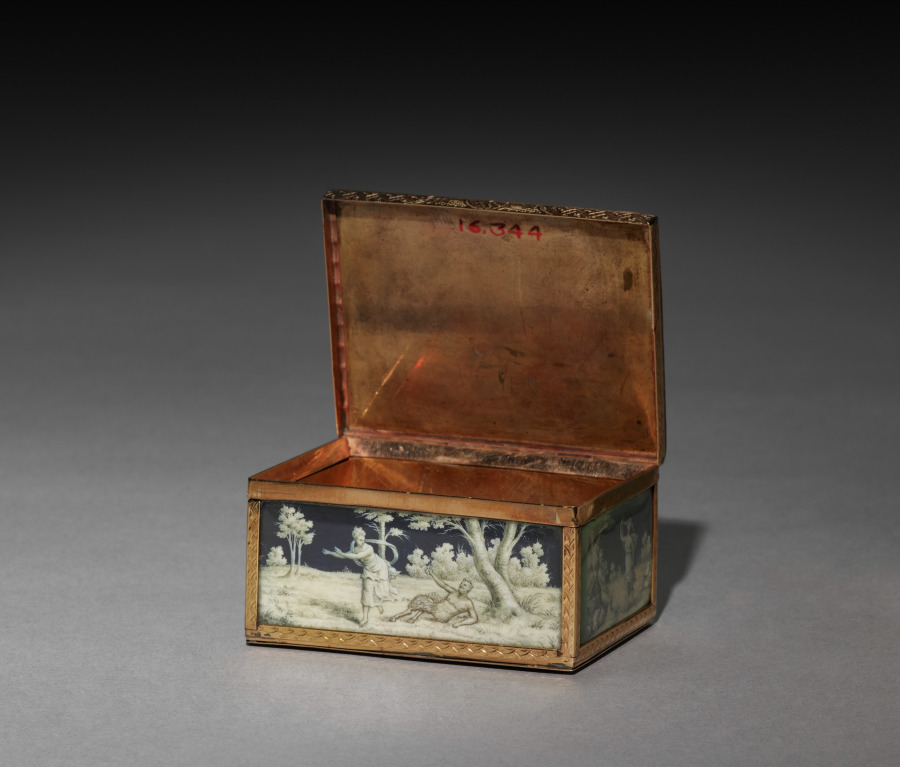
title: Box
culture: France, 19th century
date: 1800s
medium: painted miniatures under glass mounted in gold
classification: Miscellaneous